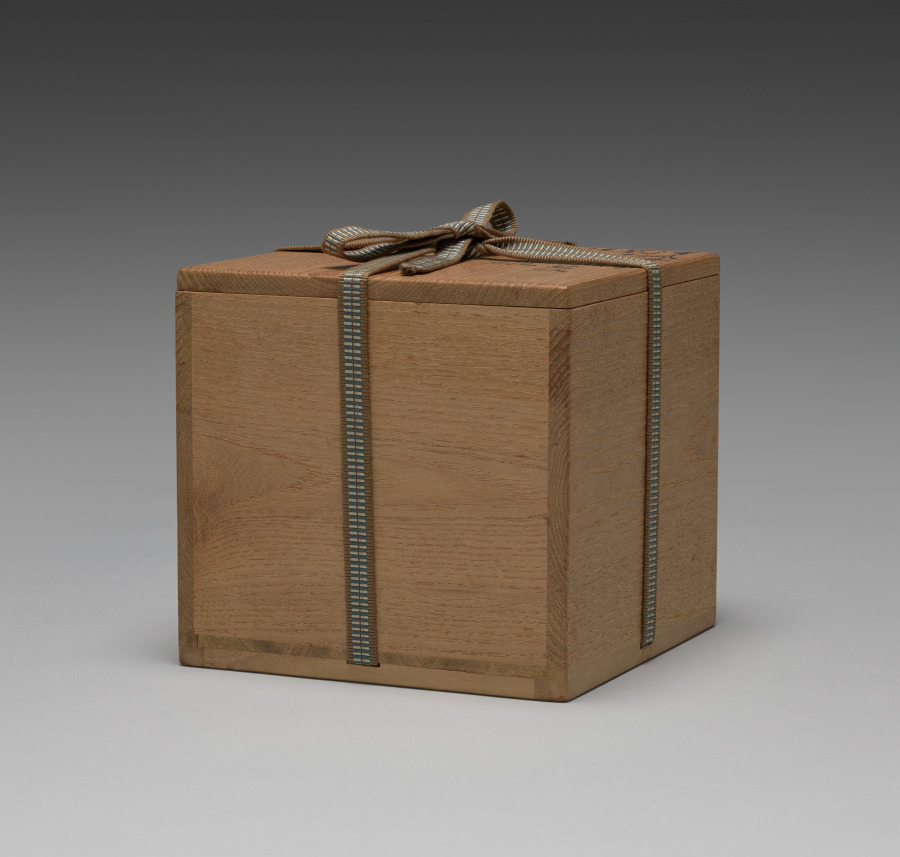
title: Teapot with Ruyi Motifs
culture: Japan, Meiji period (1868–1912)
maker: Seifū Yohei III (Japanese, 1851–1914)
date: 1893–1914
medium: Porcelain with molded design and iron handles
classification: Ceramic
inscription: The base of the pot has a “Seifu” seal.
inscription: Inscription on the box dated to 1960.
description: The simple, round form of this teapot is embellished with only a pair of nyoi staff-head motifs, one on each side. Two arched iron handles, parallel to each other, are hooked through holes in raised tabs at the front and back of the shoulders of the pot. The round lid is depressed so that an iron ring handle fastened with an iron clamp passing through the lid can lie flat inside the recessed area. The box is not original to the piece and has an inscription dated to 1960. The person who wrote it clearly admired Yohei III and his efforts to produce works that resembled Chinese ceramics. The inscription describes Yohei’s journey to perfecting these copies but misidentified the Chinese kiln whose wares were the basis for this particular work.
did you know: The base of the pot has a “Seifu” seal.